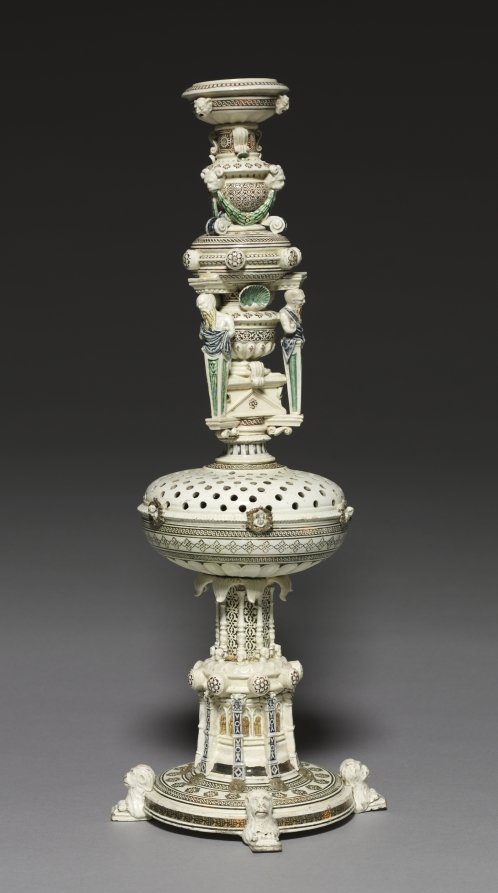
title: Flower Vase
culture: France, 16th century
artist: Saint-Porchaire (French)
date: c. 1520–1540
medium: lead-glazed white-paste earthenware, molded and inlaid slip decoration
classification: Ceramic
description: Made as two separate elements, this extremely rare example of Saint-Porchaire ware may have been conceived primarily as a tour de force of decorative art.